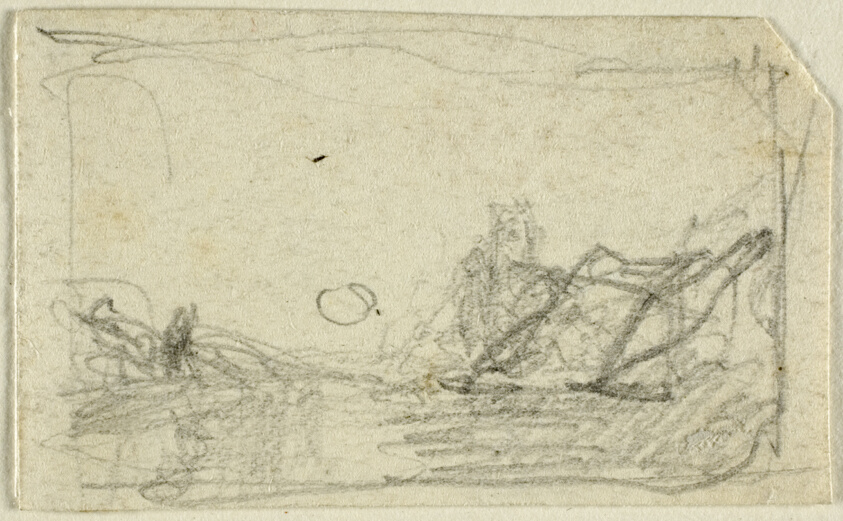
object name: Drawing and Watercolor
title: Moonlight over Landscape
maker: John Sell Cotman (English, 1782-1842)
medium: Graphite on ivory wove paper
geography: England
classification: graphite; drawings (visual works); prints and drawing